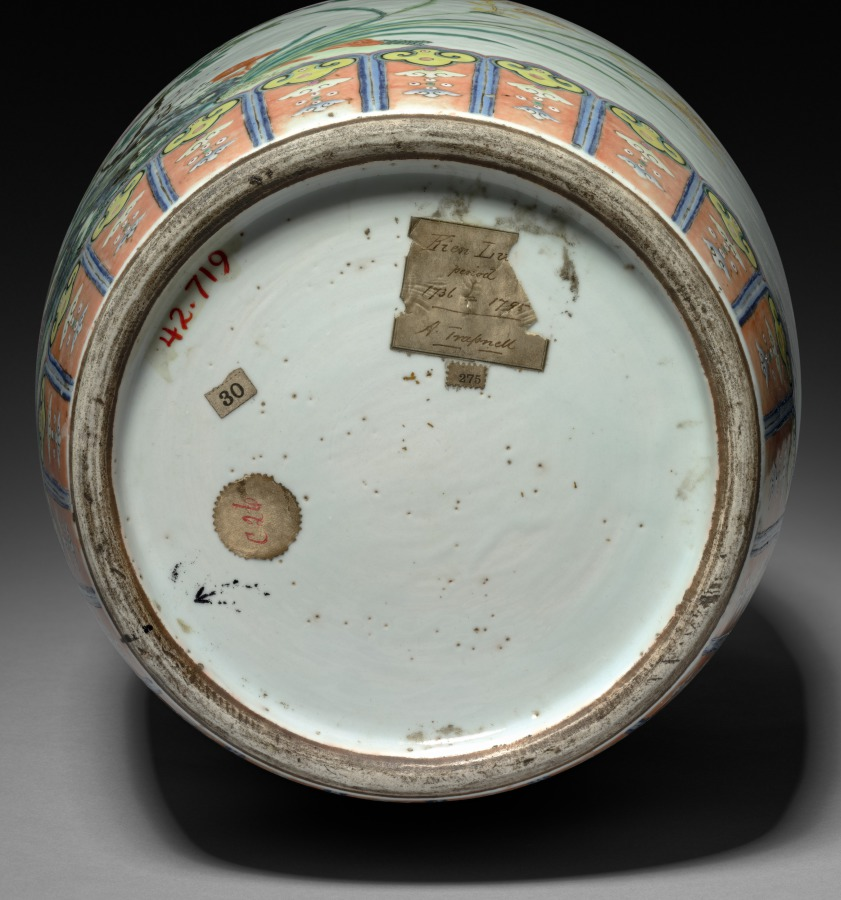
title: Vase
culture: China, Qing dynasty (1644–1911), Qianlong reign (1736–95)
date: 1736–95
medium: porcelain with famille rose overglaze enamel decoration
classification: Ceramic